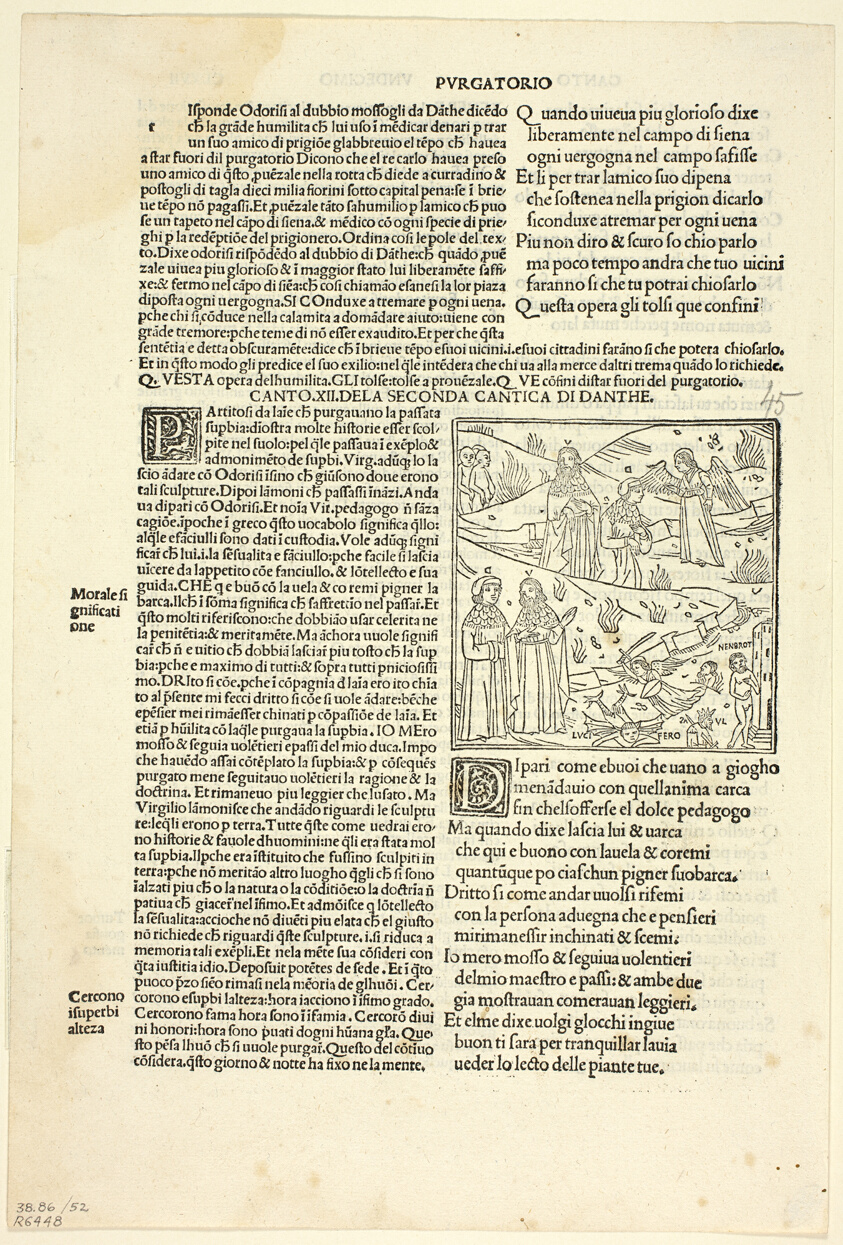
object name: Print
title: Inferno: Canto XII (Circle Seven, First Ring) from Divina Commedia (Divine Comedy), Plate 52 from Woodcuts from Books of the 15th Century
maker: Unknown Artist (Venice, late 15th century); printed and published by Petrus de Quarengiis (Italian, active 1492-1514); original text by Dante (Italian, c. 1265-1321); portfolio text by Wilhelm Ludwig Schreiber (German, 1855–1932)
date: 1497, portfolio assembled 1929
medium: Woodcut in black, and letterpress in black (recto and verso), on cream laid paper, tipped onto cream wove paper mat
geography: Italy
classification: woodcut; print; prints and drawing